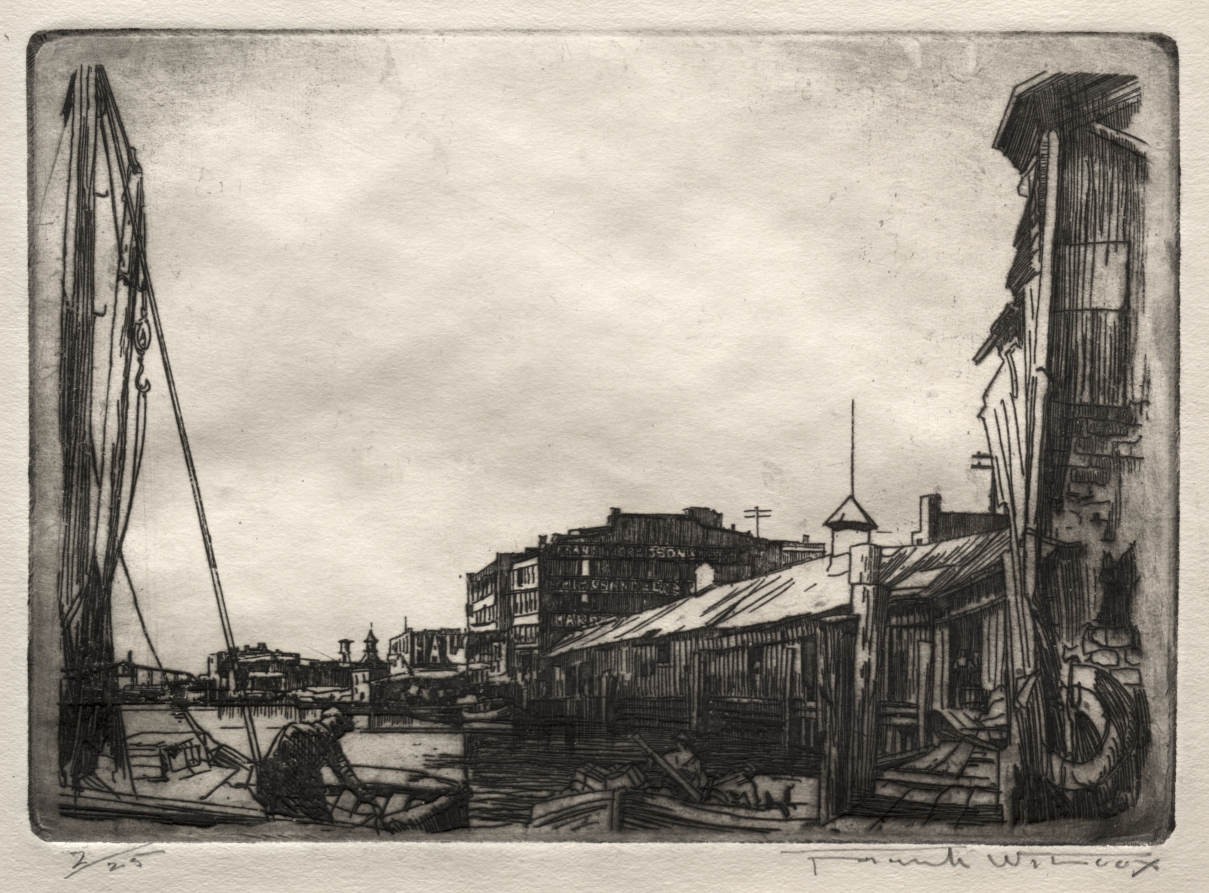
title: Waterfront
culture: America, Ohio, Cleveland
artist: Frank Wilcox (American, 1887–1964)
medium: etching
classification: Print